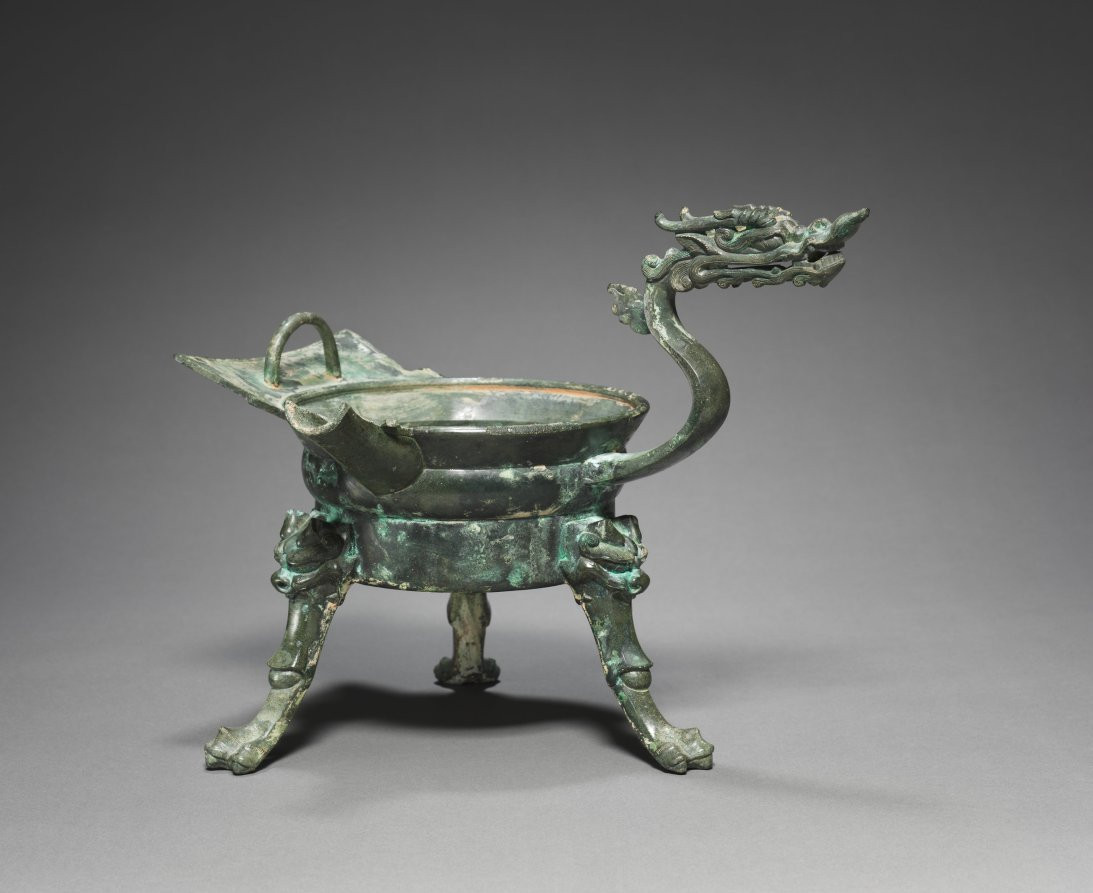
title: Tripod Container with Dragon-Head Handle (Zhadou)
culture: China, Southern and Northern Dynasties period (386-589)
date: 500s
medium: bronze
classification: Metalwork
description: This dragon, winged chimera (CMA 1980.184), and grotesque monster's face (CMA 1930.731) exhibit uninhibited imagination in the representation of fantastic animals--all are full of energy, vigor, and magical power. Whether as purely sculptural forms or decorative elements of utilitarian vessels, they are characterized by a sensitive modeling of dynamic forms with the typical Chinese elegance of line.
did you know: The tripod is supported by three splayed legs issuing from mouths of lion heads and ending in pawed feet.